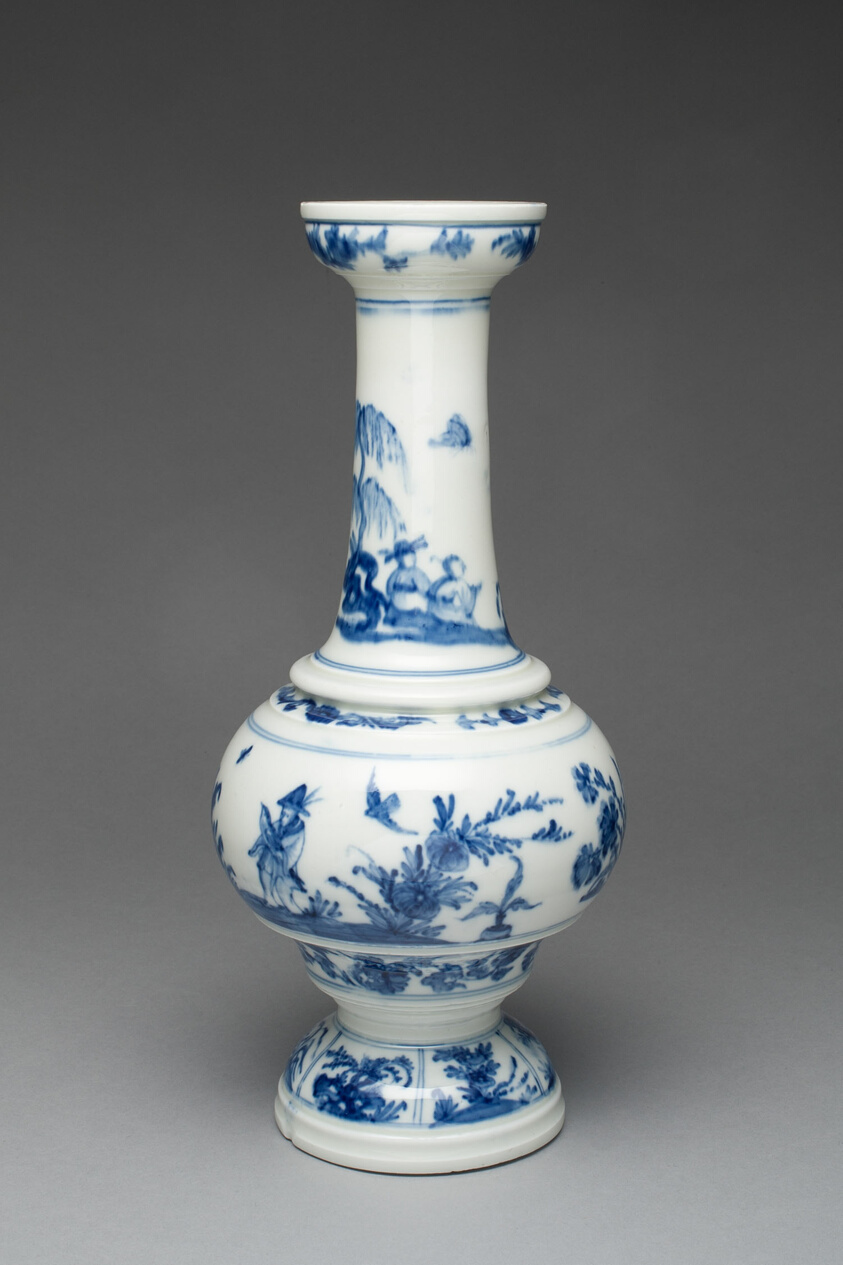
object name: Ceramics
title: Vase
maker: Meissen Porcelain Manufactory (German, founded 1710)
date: 1723–25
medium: Hard-paste porcelain with underglaze blue decoration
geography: Meissen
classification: vase; vessel; porcelain; ceramics; european decorative arts